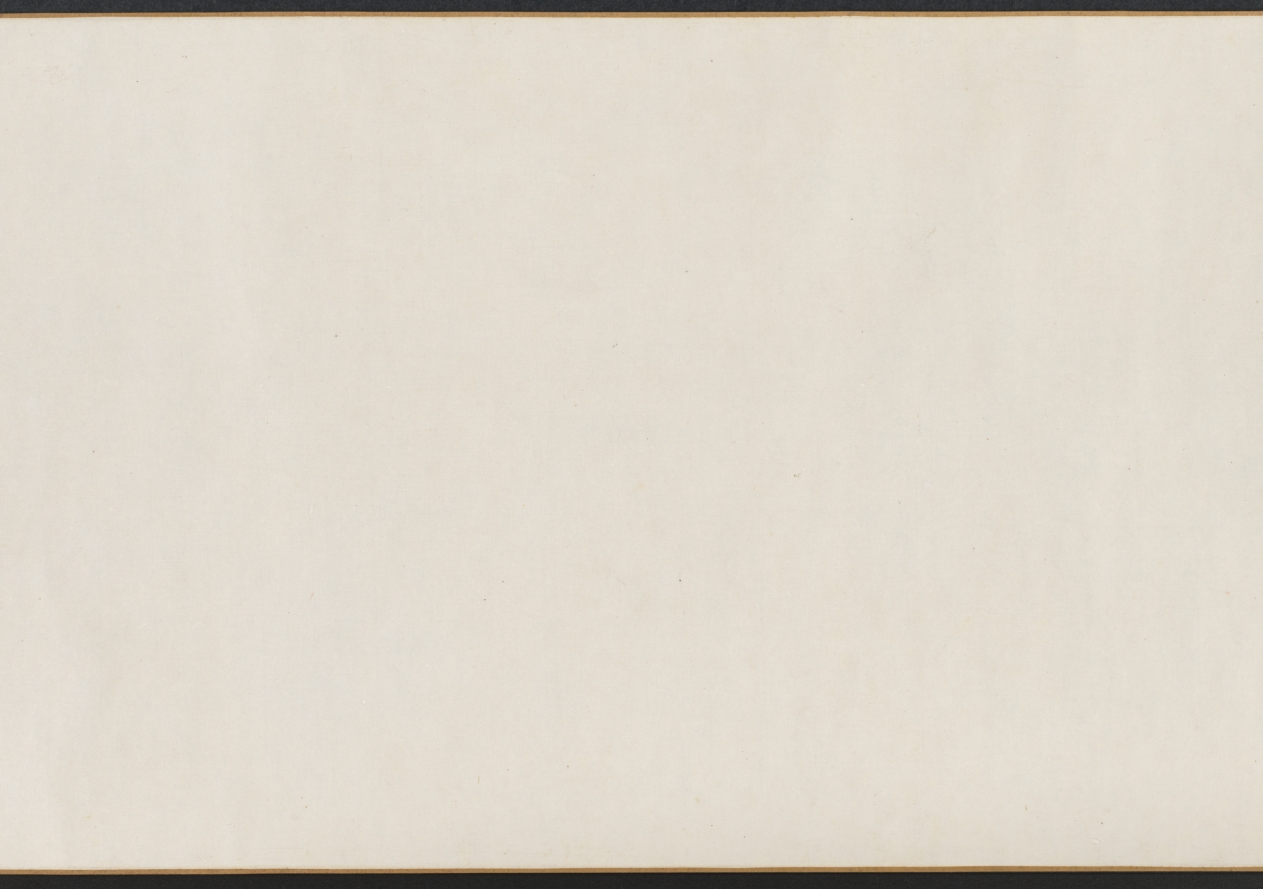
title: The Nine Elders of the Mountain of Fragrance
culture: China, Ming dynasty (1368–1644)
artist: attributed to Xie Huan (Chinese, c. 1370-c.1450)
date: 1426–52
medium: handscroll, ink and color on silk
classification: Painting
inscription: 4 seals: 2 of Xiang Yuanbian 項元汴 (1525–1590); 1 of the Qianlong Emperor (r. 1736-95); 1 of C. C. Wang 王季遷 (1907–2003)